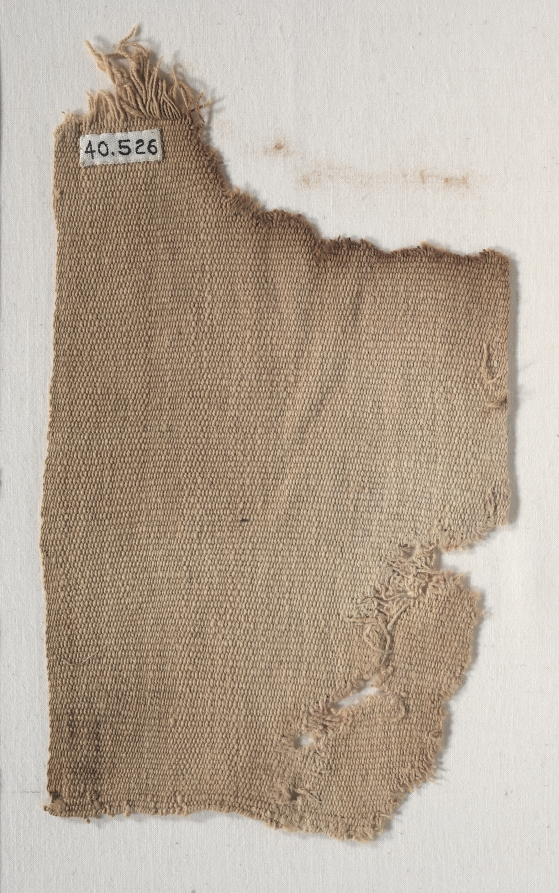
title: Mummy Bundle "Mask"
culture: Peru, South Coast, Ica Valley, Ocucaje site, Paracas style (700 BCE–1 CE)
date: 200–1 BCE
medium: plain warp-faced cloth, painted: cotton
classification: Textile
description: The Paracas people of Peru's south coast buried their dead in pear-shaped mummy bundles made of a seated human body carefully wrapped in garments and other textiles. Sometimes a painted cloth was placed at the top of the bundle, as if serving as the bundle's face, head, or "mask." The cloth was padded on the back so it curved outward like a face, and the tress-like yarns (unwoven warps) at the upper edge were arranged around a solid cotton disk that, in turn, was wrapped with a headband. Some cloths were painted with mask-like faces, and others with full figures, apparently mythical creatures.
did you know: These masks fall into two categories, those with only a face and those with a full-bodied figure.